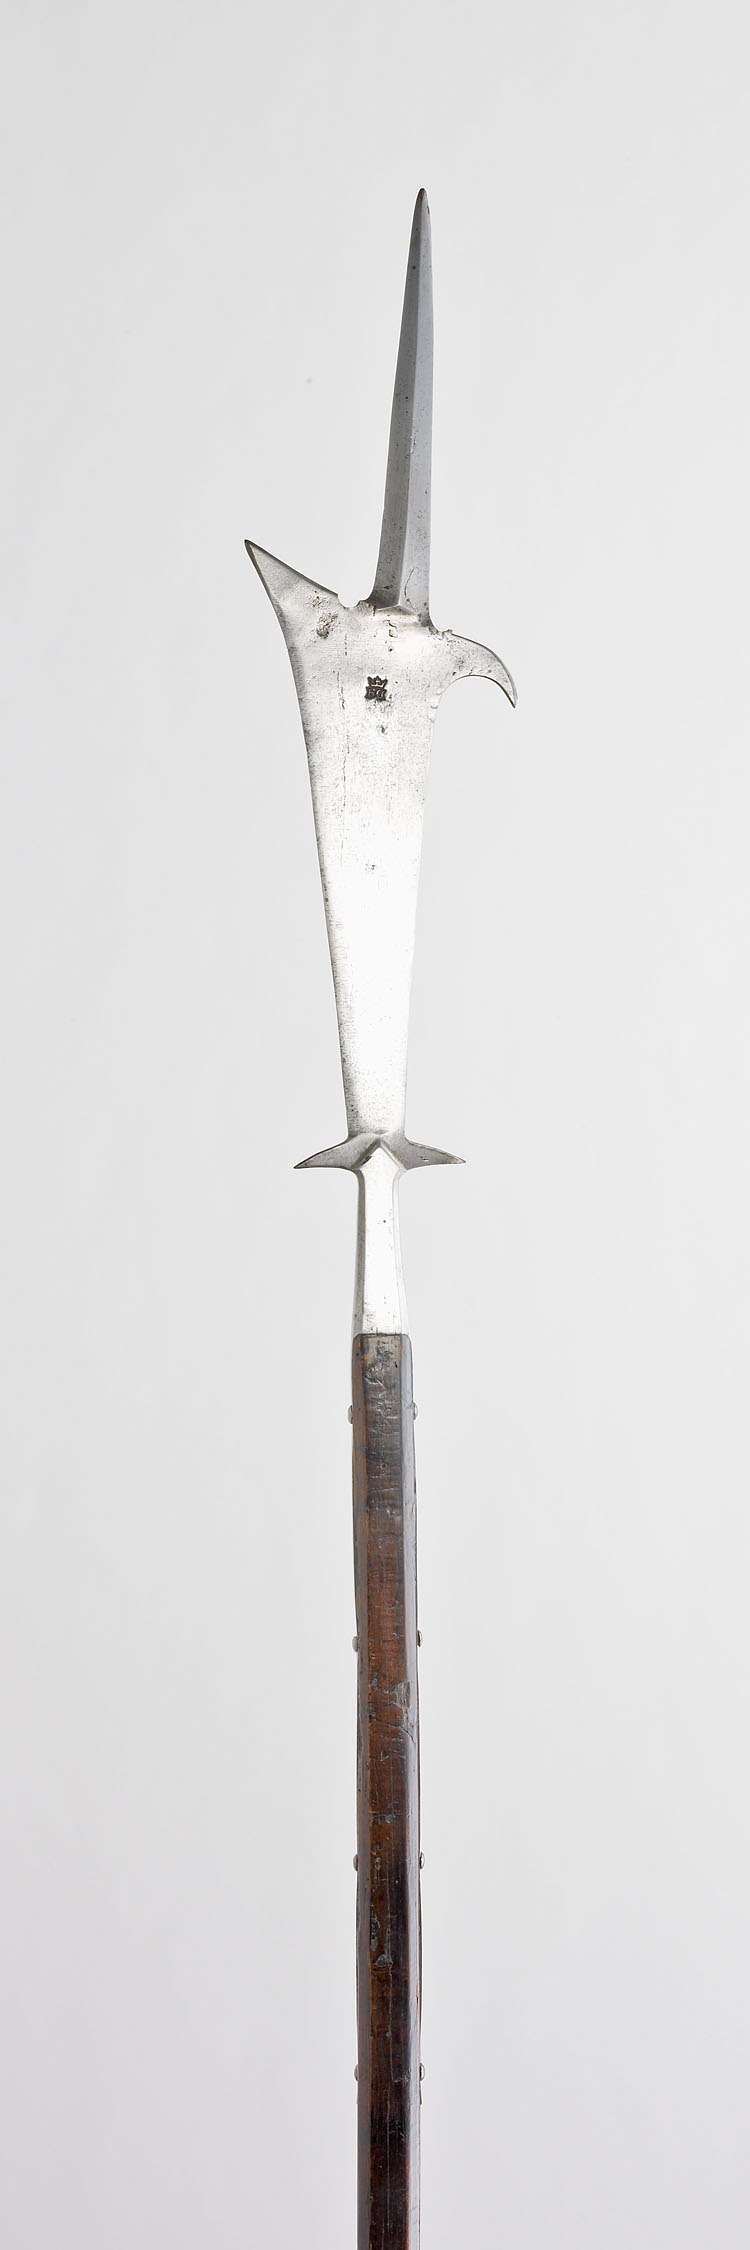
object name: Arms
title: Halberd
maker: Master B. E. (Italian)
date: 1500/40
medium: Steel and wood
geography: Italy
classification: edged weapon-staff; arms; arms and armor